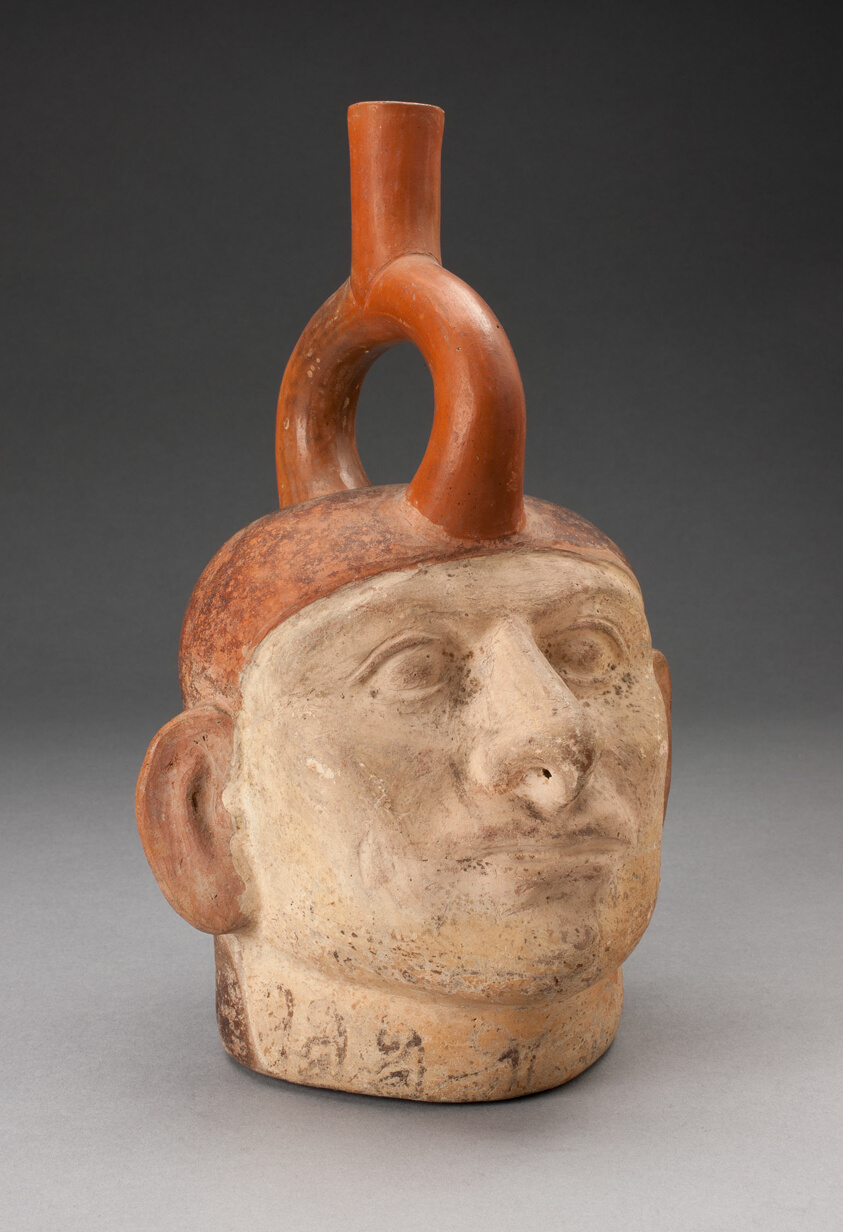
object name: Vessel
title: Portrait Vessel of a Figure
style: moche, Arts of the Americas, andes, south american, andean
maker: Moche (Chimbote, Santa Valley, north coast, Peru)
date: 100 BCE–500 CE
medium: Ceramic and pigment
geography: Peruvian North Coast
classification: earthenware; ceramics; vessel; art of the americas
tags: people, portraits